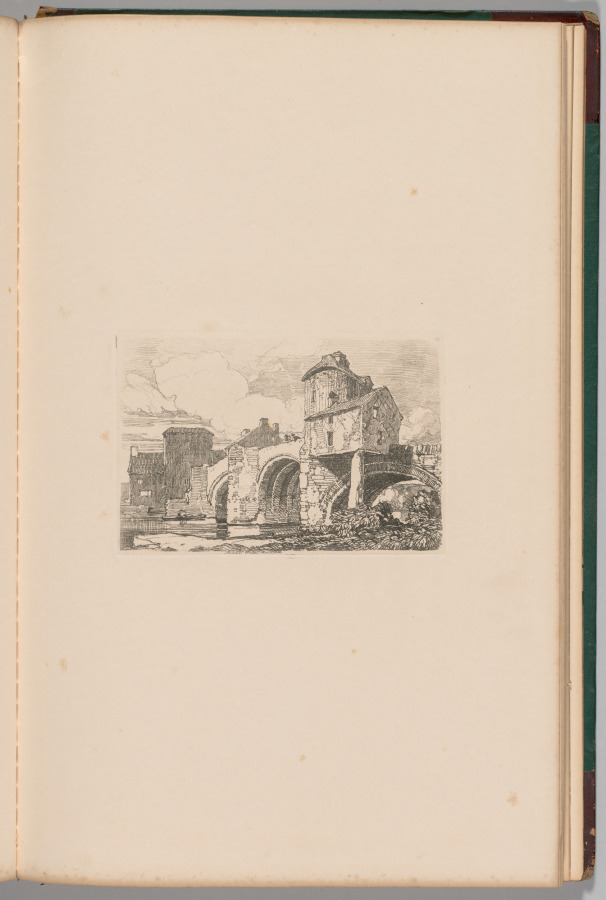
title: Liber Studiorum: Plate 26, Monnow Bridge, Monmouthshire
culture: England, 19th century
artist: John Sell Cotman (British, 1782–1842)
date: 1838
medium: softground etching, from a bound volume containing 48 plates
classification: Bound Volume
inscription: In plate, within image, upper right: 26; in plate, below image: Monnow Bridge, Monmouthshire